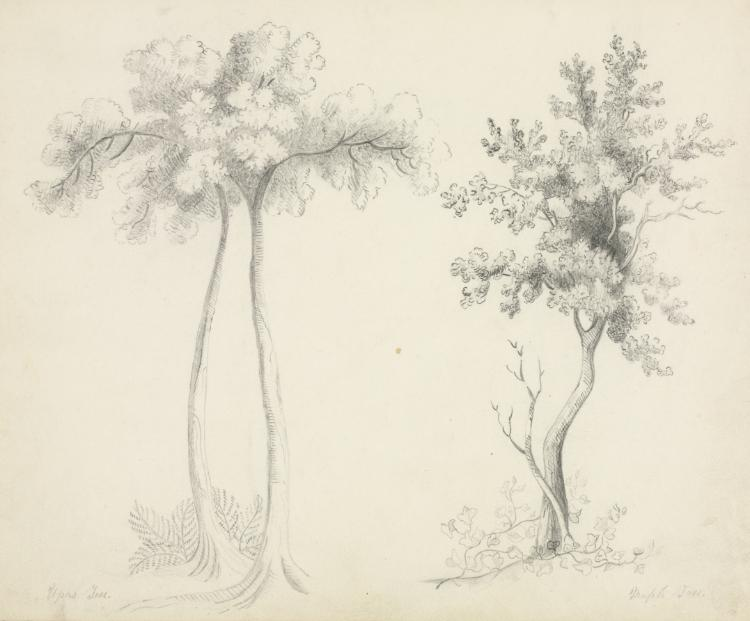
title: Studies of Upas and Maple Trees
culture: America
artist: Mary Altha Nims (American, 1817–1907)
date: 1800s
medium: pencil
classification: Drawing